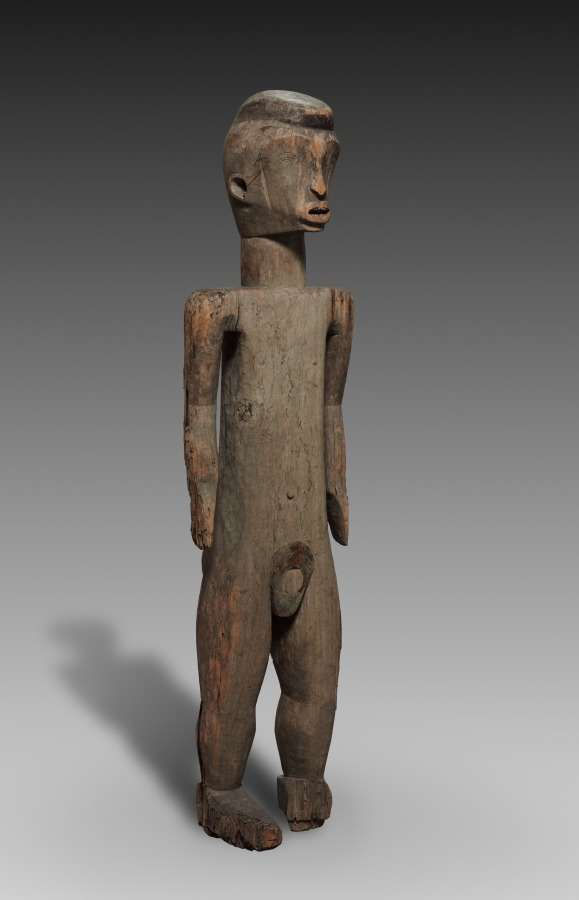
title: Pair of Figures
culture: Africa, Central Africa, Democratic Republic of the Congo or Central African Republic (most likely), possibly Monzombo-style maker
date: late 1800s–early 1900s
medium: Wood and iron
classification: Sculpture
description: The Ubangi region's history of successive migrations and assimilations has resulted in numerous exchanges of religious beliefs and ritual practices. Despite some stylistic traits, including the heart-shaped faces and the male's crested coiffure, this figure with its female pair is unlike any other in the Ubangian corpus. Based on indirect evidence, the pair is said to represent the culture's primordial couple.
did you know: This male and female pair is said to represent the culture's primordial couple.